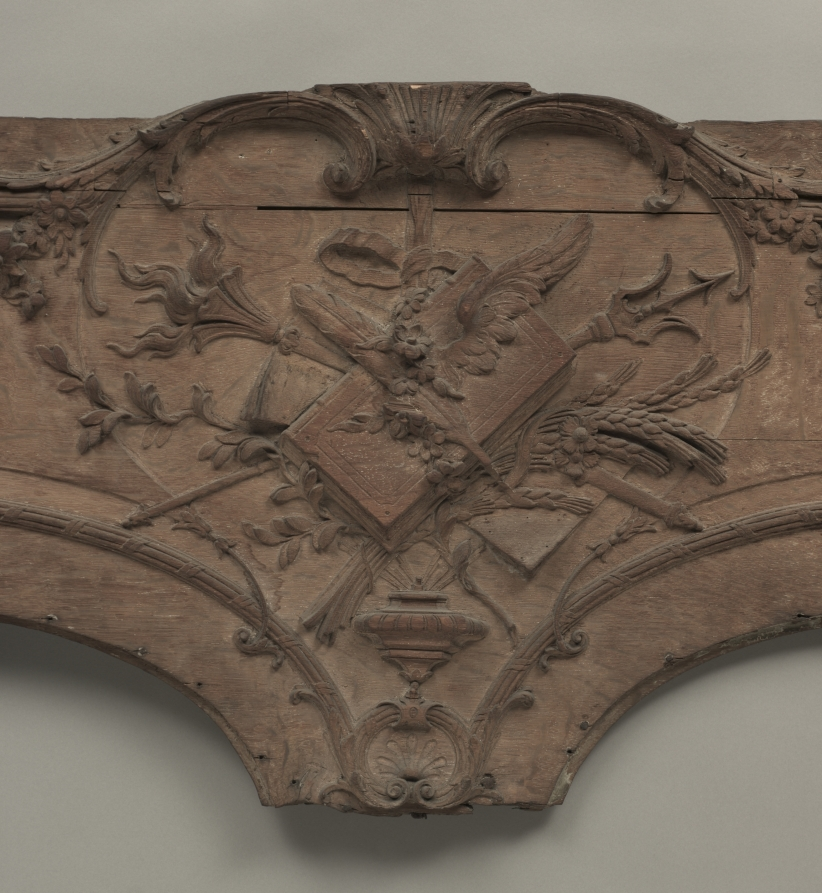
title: Panel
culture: France, Regency Period, 18th Century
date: 1715–1723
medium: wood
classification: Furniture and woodwork